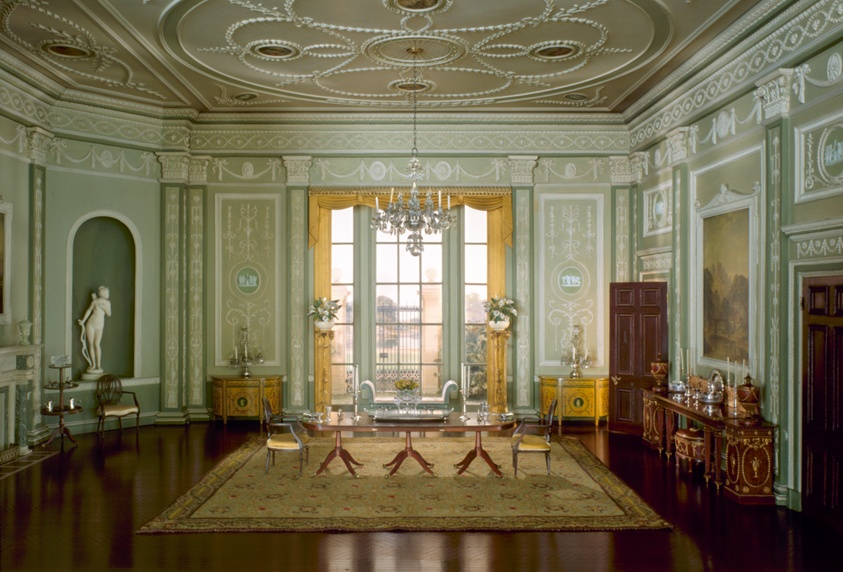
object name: Miniature room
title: E-10: English Dining Room of the Georgian Period, 1770-90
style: georgian, european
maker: Designed by Narcissa Niblack Thorne; American, 1882-1966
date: c. 1937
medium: Miniature room, mixed media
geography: United States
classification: miniature; thorne rooms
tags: interiors, interior design, dinning rooms, furniture, chandeliers